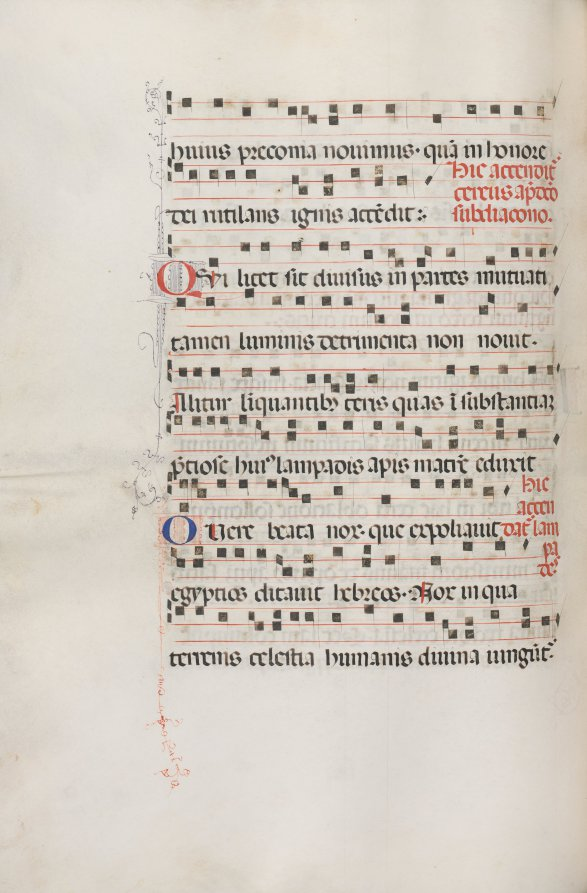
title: Missale: Fol. 156v: Music for "Exultet"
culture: Italy, Perugia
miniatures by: Bartolommeo Caporali (Italian, c. 1420–1503)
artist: assisted by Giapeco Caporali (Italian, d. 1478)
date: 1469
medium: ink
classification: Bound Volume